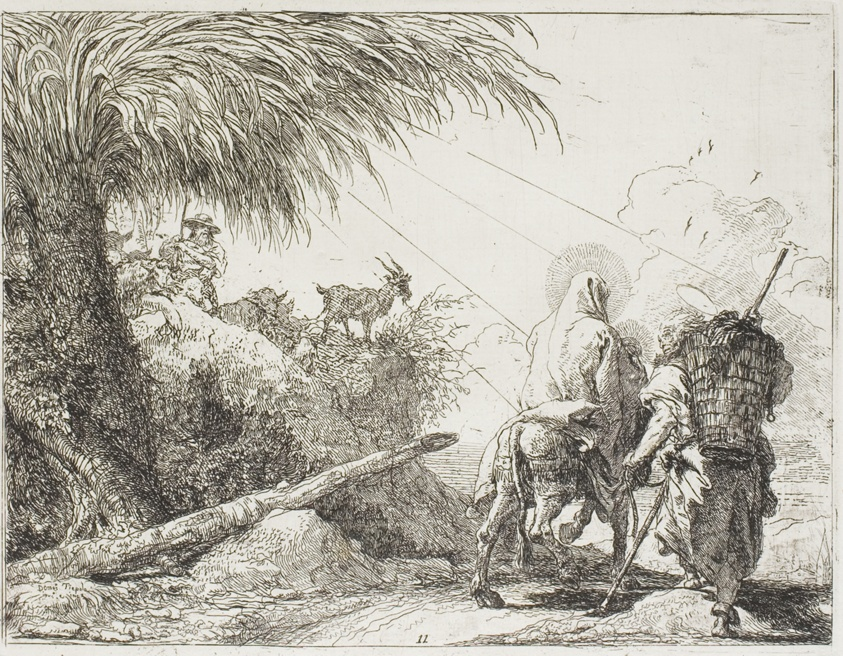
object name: Print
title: Joseph and Mary Passing a Shepherd and His Flock, plate eleven from The Flight into Egypt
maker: Giovanni Domenico Tiepolo (Italian, 1727-1804)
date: 1753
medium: Etching on paper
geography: Italy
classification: etching; print; prints and drawing